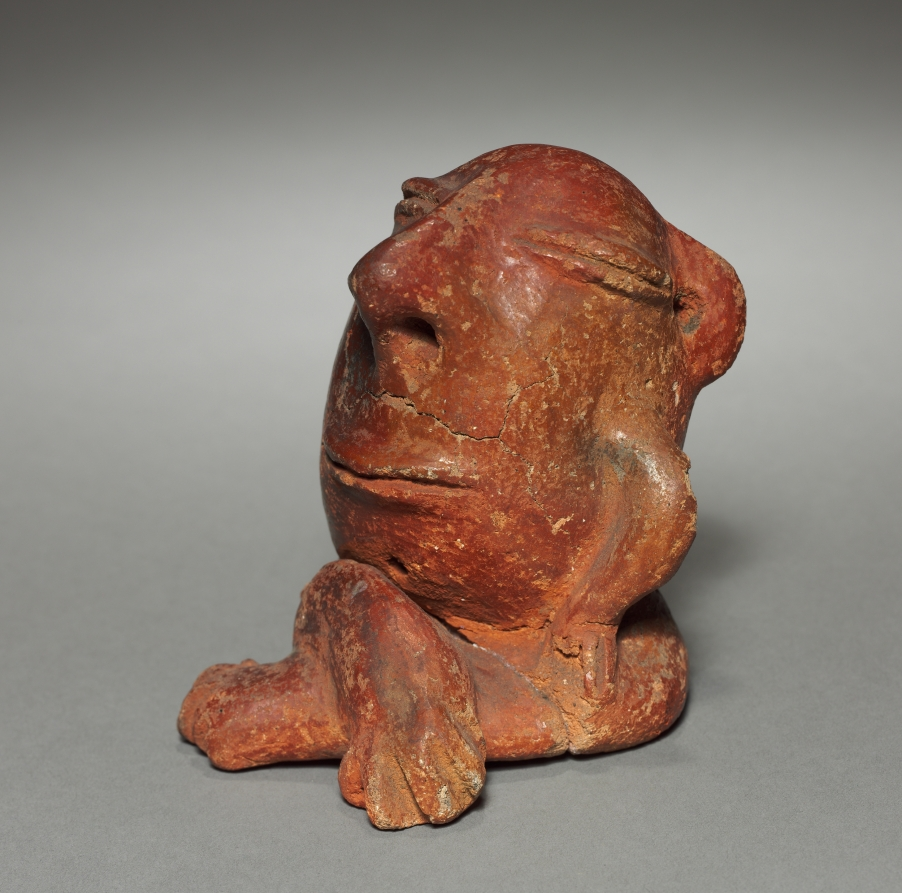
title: Grotesque Figure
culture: Colombia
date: before 1921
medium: red ware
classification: Ceramic